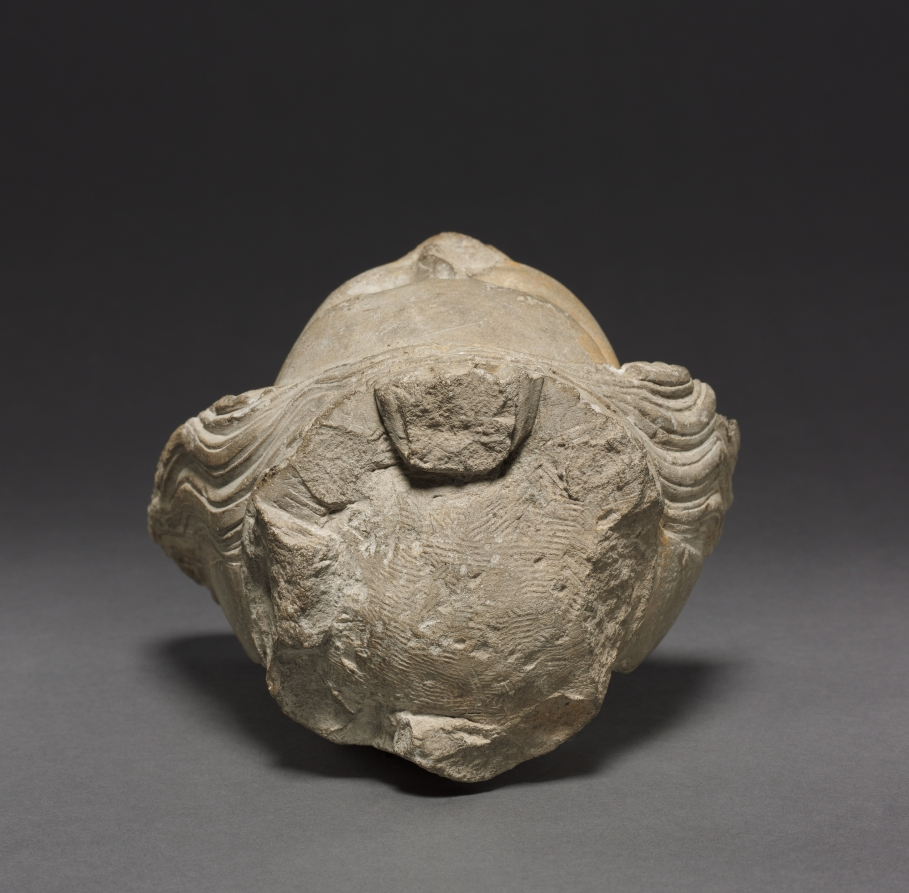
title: Crowned Female Head (Fragment)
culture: France, Champagne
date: c. 1400–1420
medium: limestone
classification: Sculpture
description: The origins of this sculptural fragment are not known. It is perhaps the final trace of the once beautiful figure of a standing Virgin and Child.